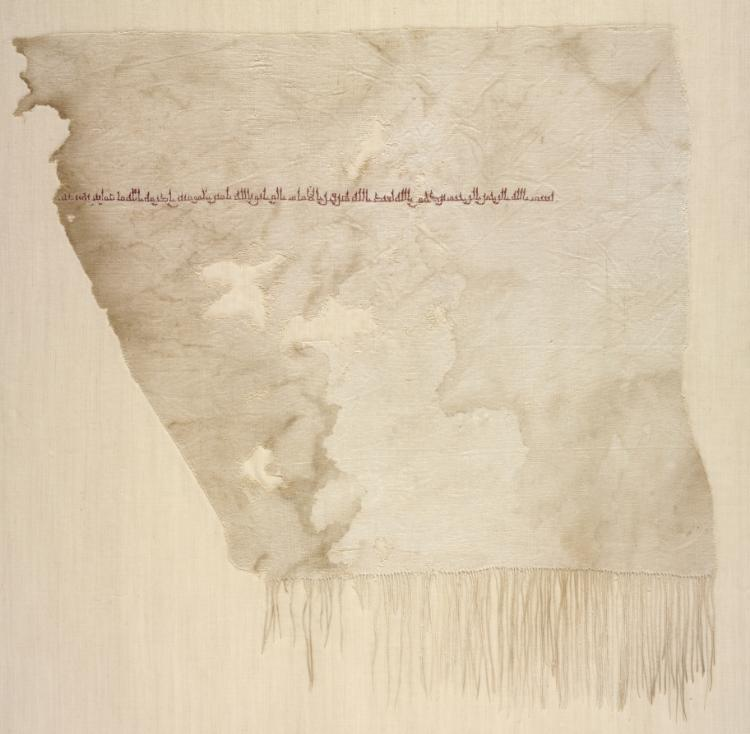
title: Embroidered tiraz with fringe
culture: Egypt, Tunah, Abbasid period, Caliphate of al-Wathiqu, 847-861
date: 847–861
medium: plain weave with embroidery: linen and silk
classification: Embroidery